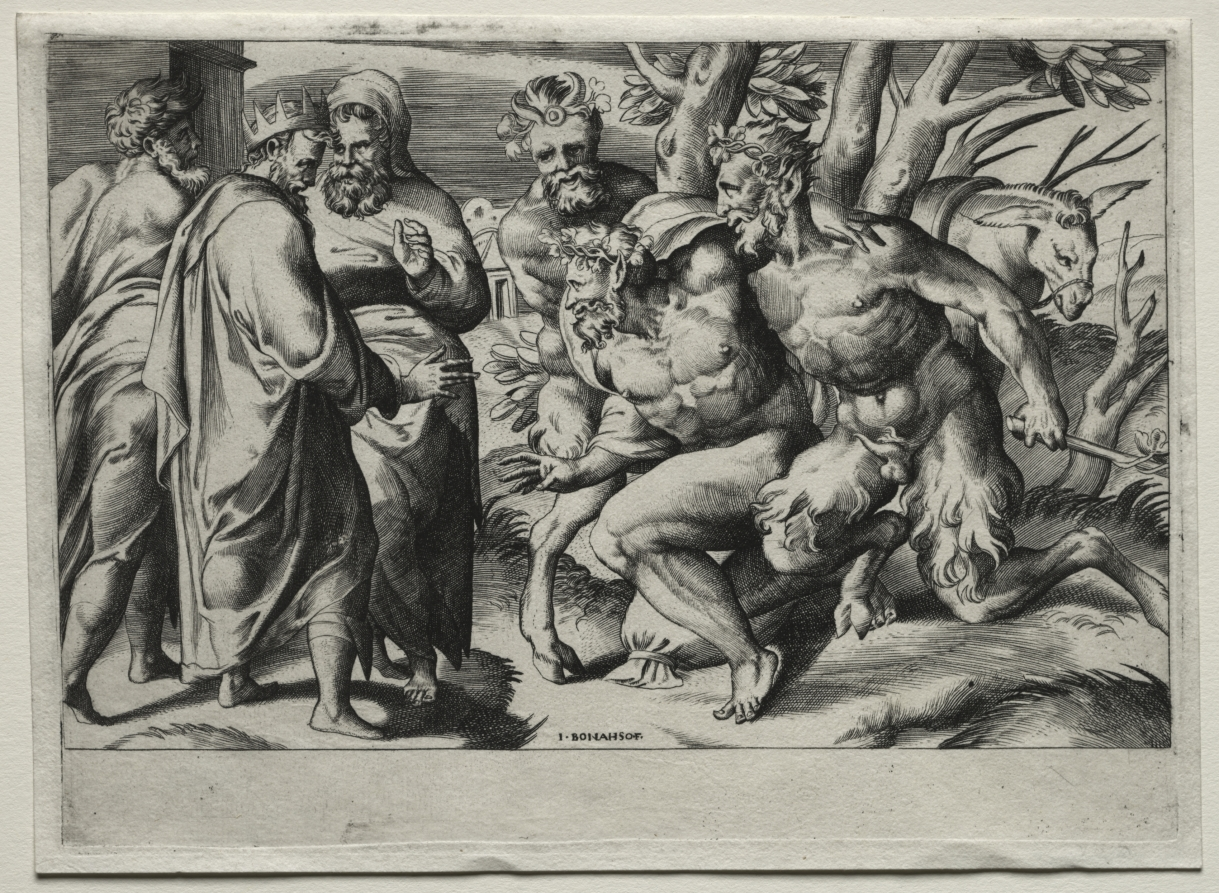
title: Silenus and King Midas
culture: Italy, 16th century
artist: Giulio Bonasone (Italian, c. 1510–after 1576)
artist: after Perino del Vaga (Italian, 1501–1547)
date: mid 16th century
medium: engraving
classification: Print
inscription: lower center, in plate: I. BONASON·F· ; lower left, verso, in graphite: TR146201/1[crossed out] ; TR 14975/1 ; lower right, verso, in graphite: B89 THO BH ; lower right, verso, in graphite: 2050 12/15 [?]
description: In Greek mythology Silenus was an old, drunken satyr (half-man, half-goat), who visited King Midas and was graciously received. In gratitude for Midas's generous hospitality, Dionysus, the god of wine and former pupil of Silenus, granted the king one wish. Midas asked for the power to turn everything that he touched into gold. However, he soon regretted his choice, for he was unable to eat food or drink water, as they also turned to gold. Finally, Dionysus released him from the enchantment.